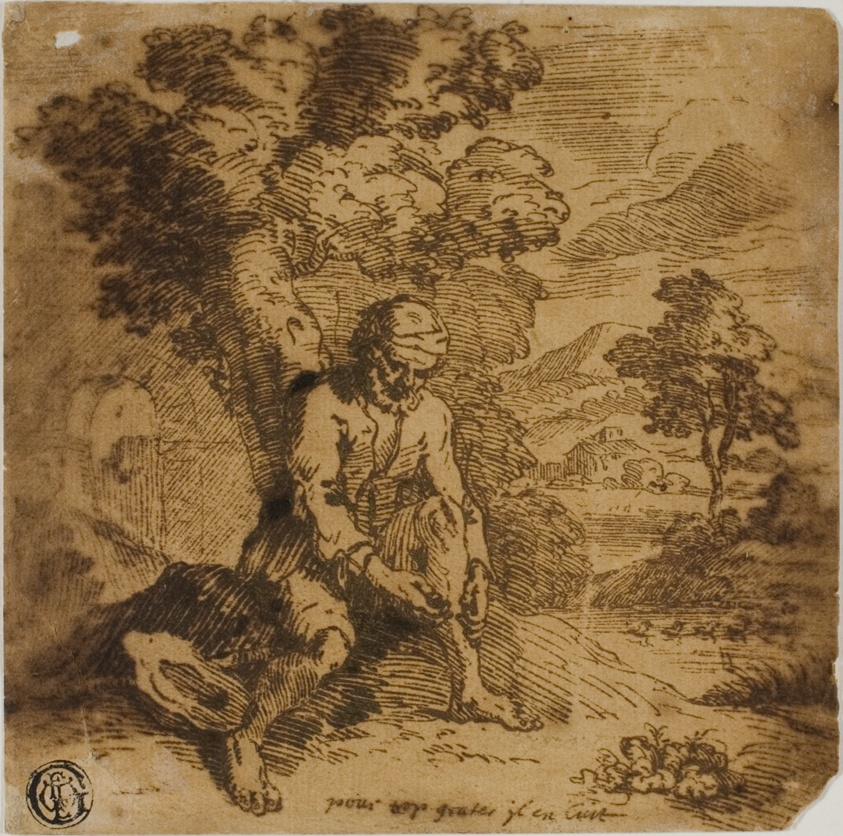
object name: Drawing and Watercolor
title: Seated Man Scratching His Leg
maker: After Adam Elsheimer (German, 1578-1610); or Jacques Callot (French, 1592-1635); or style of Jacques Callot (French, 1592-1635)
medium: Pen and brown ink on tan laid paper laid down on white Japanese paper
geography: Germany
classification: pen and ink drawings; drawings (visual works); prints and drawing